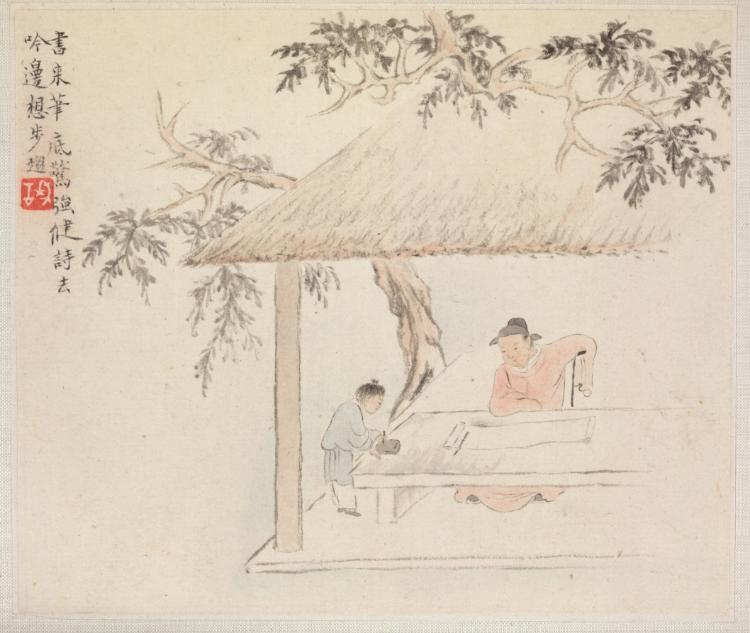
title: Album of Landscape Paintings Illustrating Old Poems: A Scholar at a Table with a Servant aside Preparing the Ink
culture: China, Qing dynasty (1644-1911)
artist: Hua Yan (Chinese, 1682–c. 1765)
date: 1745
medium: Album leaf; ink and light color on paper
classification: Painting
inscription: Calligraphy and seal, upper left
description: Hua Yan is one of the Eight Eccentrics of Yangzhou, who rejected Orthodox ideas about painting.